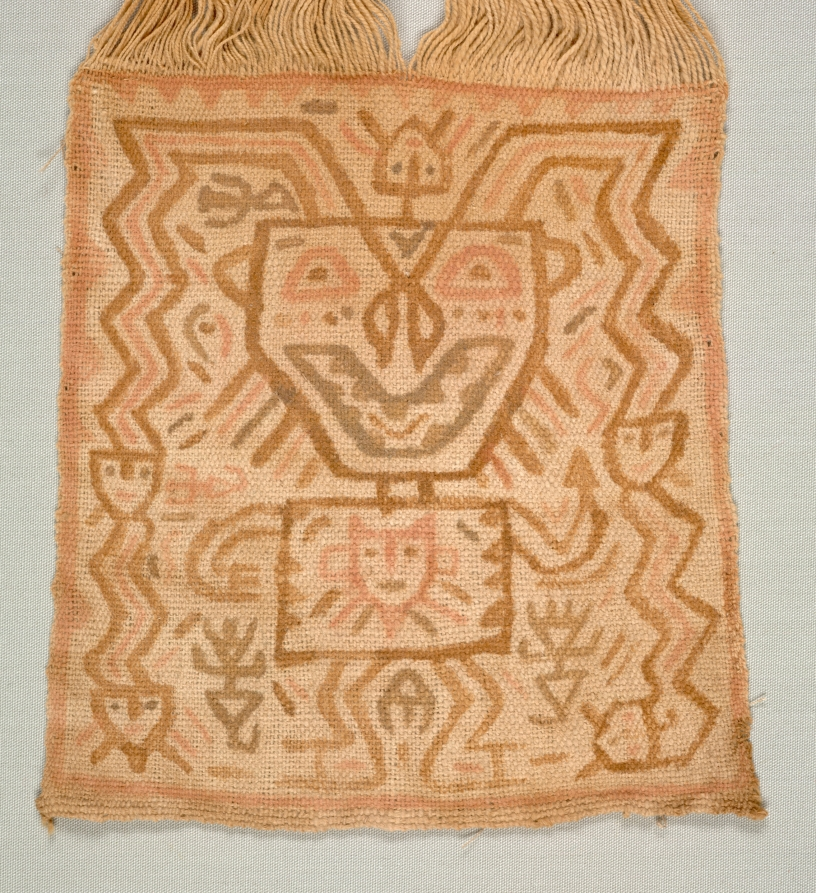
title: Mummy Bundle "Mask"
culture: Peru, South Coast, Ica Valley, Ocucaje site, Paracas style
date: 200–1 BCE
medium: cotton: plain warp-faced cloth, painted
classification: Textile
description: The Paracas people buried their dead in pear-shaped mummy bundles, created by carefully wrapping the seated human body in layers of garments and other textiles. Sometimes a painted cloth was placed on the outer layer at the top of the bundle, as though it served as the bundle’s face, head, or “mask.” Some cloths were painted with masklike faces, although others—such as this example—feature complete figures, which may be mythological beings with supernatural appendages.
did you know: These masks fall into two categories, those with only a face and those with a full-bodied figure.